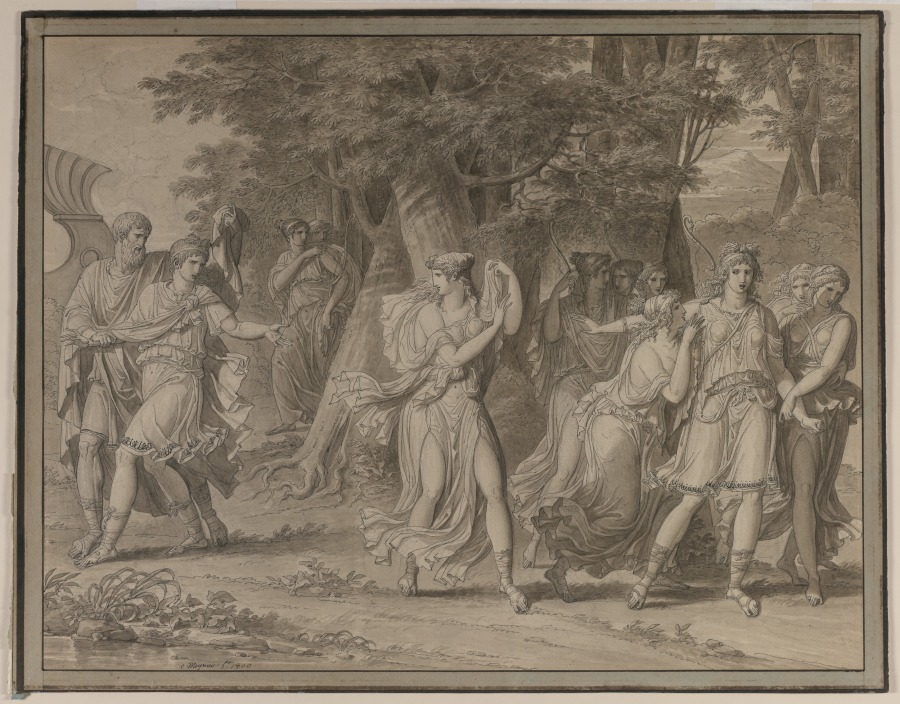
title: Telemachus, Urged by Mentor, Leaving the Island of Calypso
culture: France, 19th century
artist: Charles Meynier (French, 1768–1832)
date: 1800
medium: Pen and black ink and brown wash with black chalk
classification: Drawing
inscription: Signed, lower left, in black ink: c Meynier f.t, and inscribed, lower left, in black ink: 1800; inscribed, verso, center in black ink: Télémaque pressé par Mentor,/quitte L'île de Calypso./composition dont le tableau a Reuni tour le Suffrages /au Sallon de 1801 gravé dans les annales de peintures/Meynier. invt Delineavit 1800, and, lower right, verso, in black ink: Meynier No 157